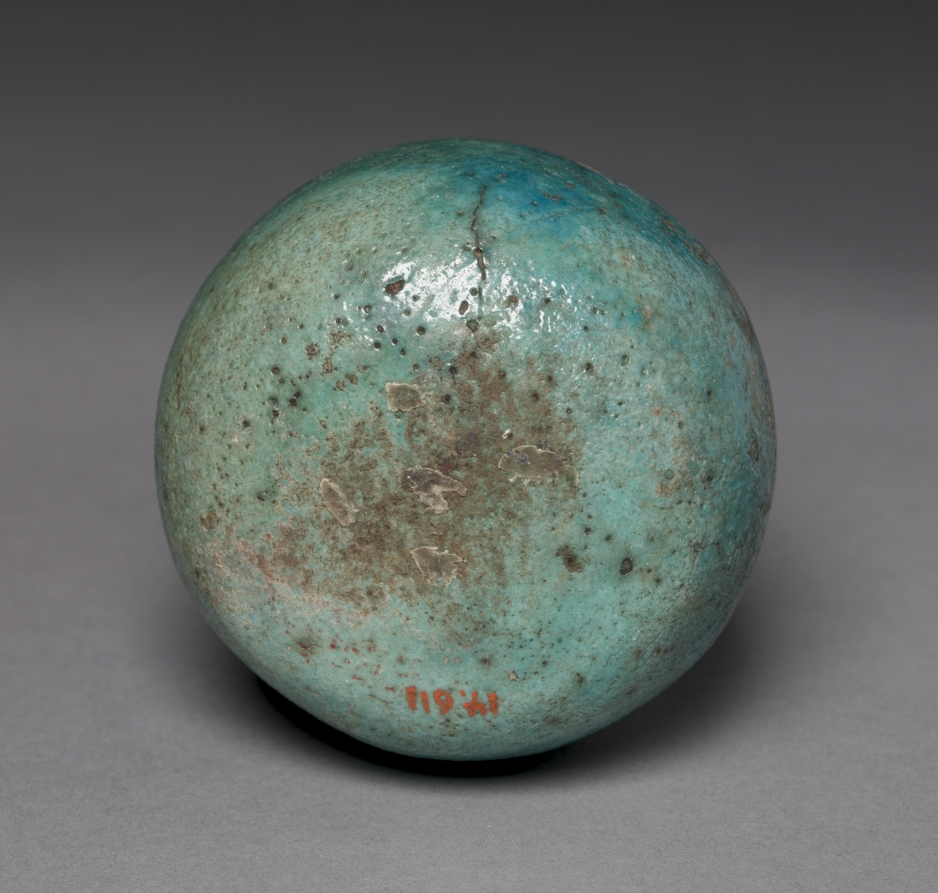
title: Situla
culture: Egypt, Late period (715–332 BCE)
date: 715–332 BCE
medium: turquoise faience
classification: Vessels